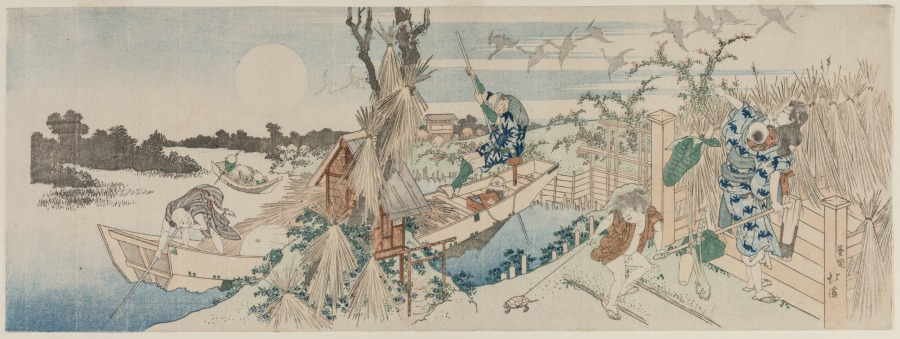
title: Landscape with Ferry Boat, Geese and Full Moon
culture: Japan, Edo period (1615–1868)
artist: Totoya Hokkei (Japanese, 1780–1850)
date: early 1830s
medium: color woodblock print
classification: Print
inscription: Signature: Aoigaoka Hokkei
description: This scene, of men in boats gathering reeds on a lake while geese fly in the moonlit sky, tells us that autumn in the air.